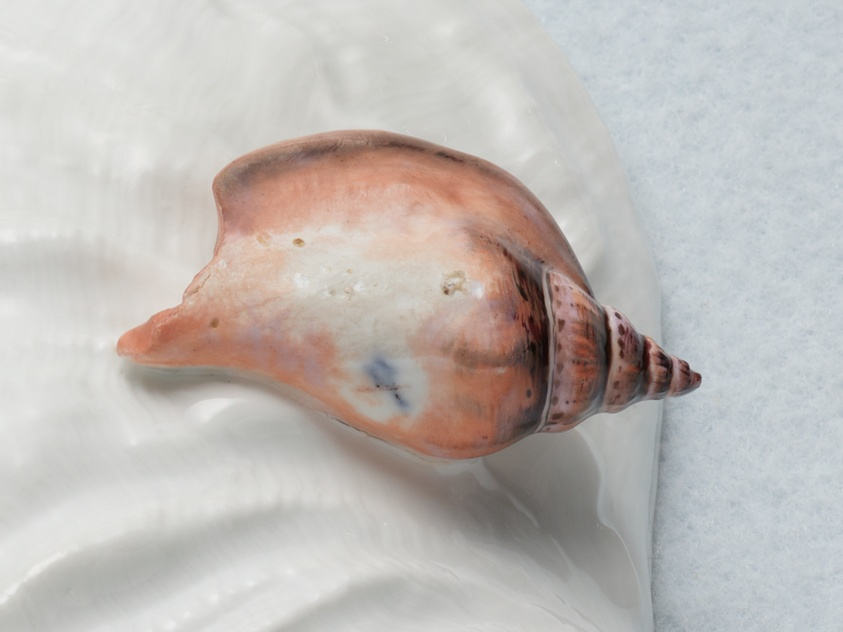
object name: Ceramics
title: Sweetmeat Box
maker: Meissen Porcelain Factory (German, founded 1710); Modeled by J. F. Eberlein (German, 1696-1749)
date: 1746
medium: Hard-paste porcelain, polychrome enamels, and gilt metal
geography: Meissen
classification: porcelain; box; ceramics; enamel; european decorative arts; metal; vessel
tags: shells, seas